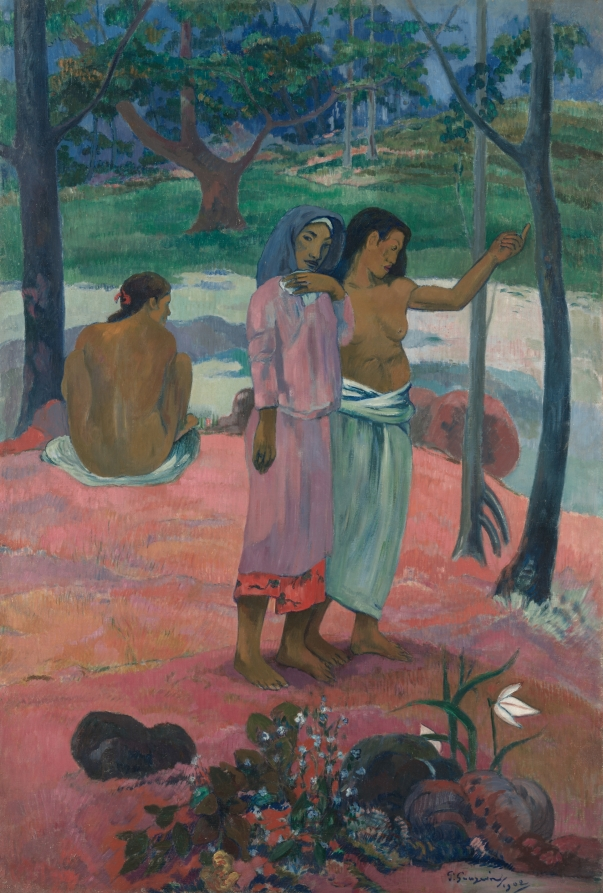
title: The Call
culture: France, late 19th-early 20th Century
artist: Paul Gauguin (French, 1848–1903)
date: 1902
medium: oil on fabric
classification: Painting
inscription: Signed lower right: P. Gauguin / 1902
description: Painted on a remote island in Polynesia a year before the artist's death, The Call belongs to a series of late works that explore the mysteries of life and death. Two women stand with bare feet, as if on sacred ground. One woman gestures to someone outside the picture, perhaps responding to a "call" from fate or destiny. Gauguin realized his ambition of painting from memory and the imagination through such mysterious, dreamlike images.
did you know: Although known as one of the founders of modern art, Gauguin found inspiration in ancient Greek, Roman, and Egyptian art. The woman with the pointing finger on the right side of this painting was taken from a figure on the Parthenon frieze.